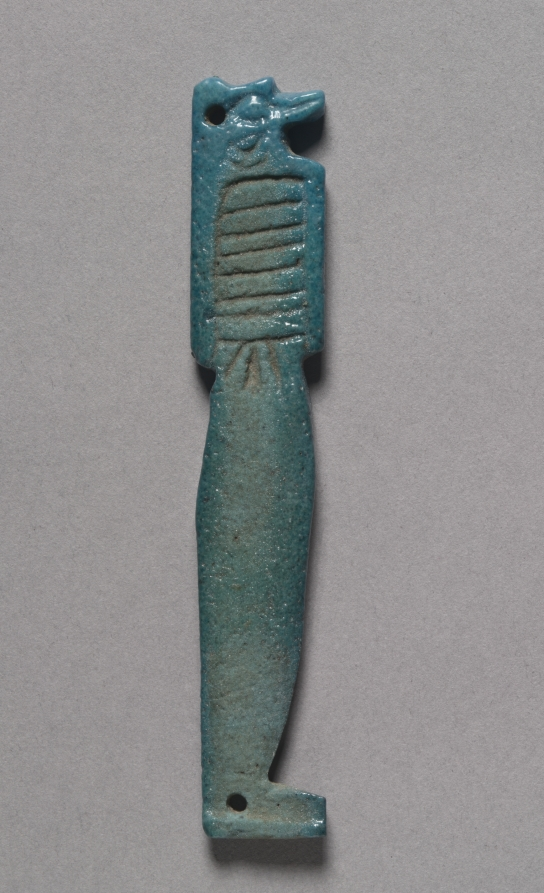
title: Son of Horus Amulet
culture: Egypt, Late period (715–332 BCE), Dynasty 26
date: 664–525 BCE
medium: bright turquoise faience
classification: Amulets